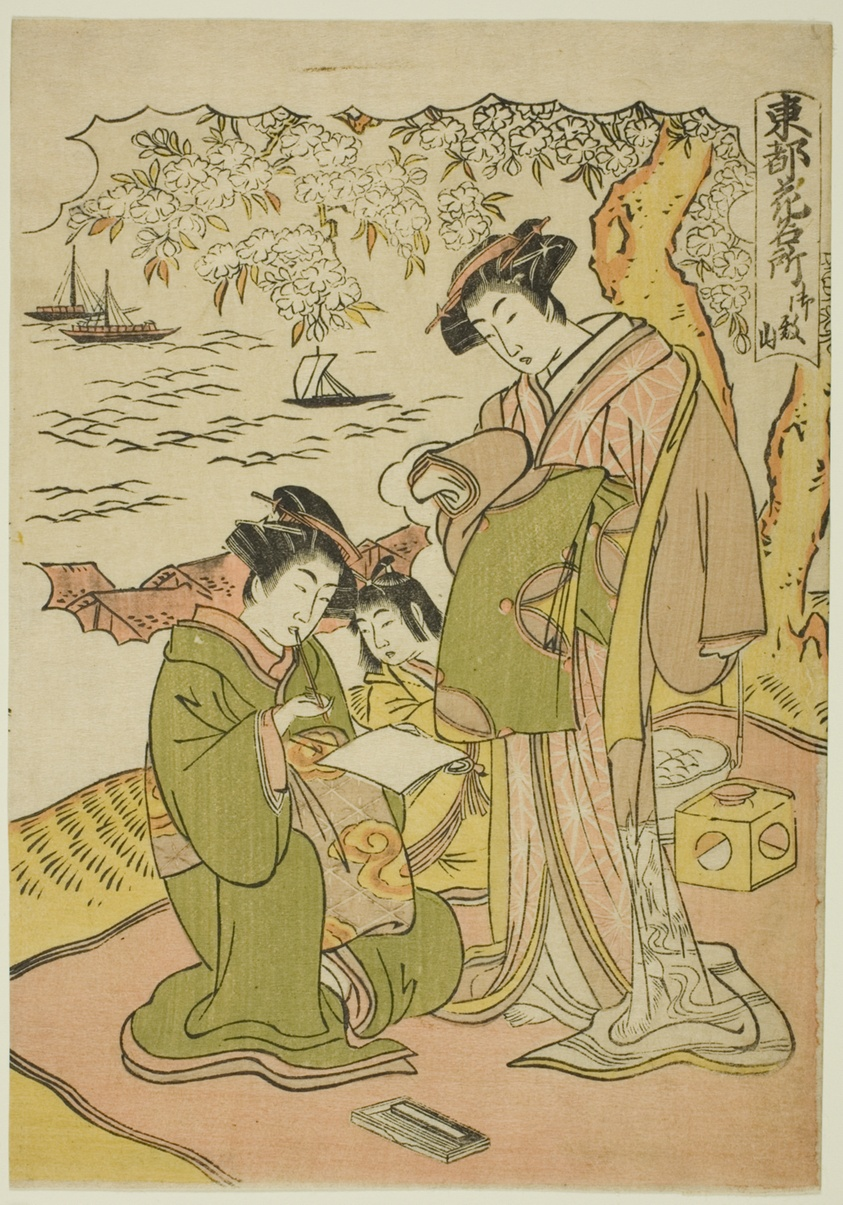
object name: Print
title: Goten Hill (Gotenyama), from the series "Famous Places for Flowers in the Eastern Capital (Toto hana meisho)"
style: Japanese (culture or style)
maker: Attributed to Kitao Masanobu; Japanese, 1761-1816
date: late 18th century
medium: Color woodblock print; chuban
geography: Japan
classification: woodblock print; print; asian art